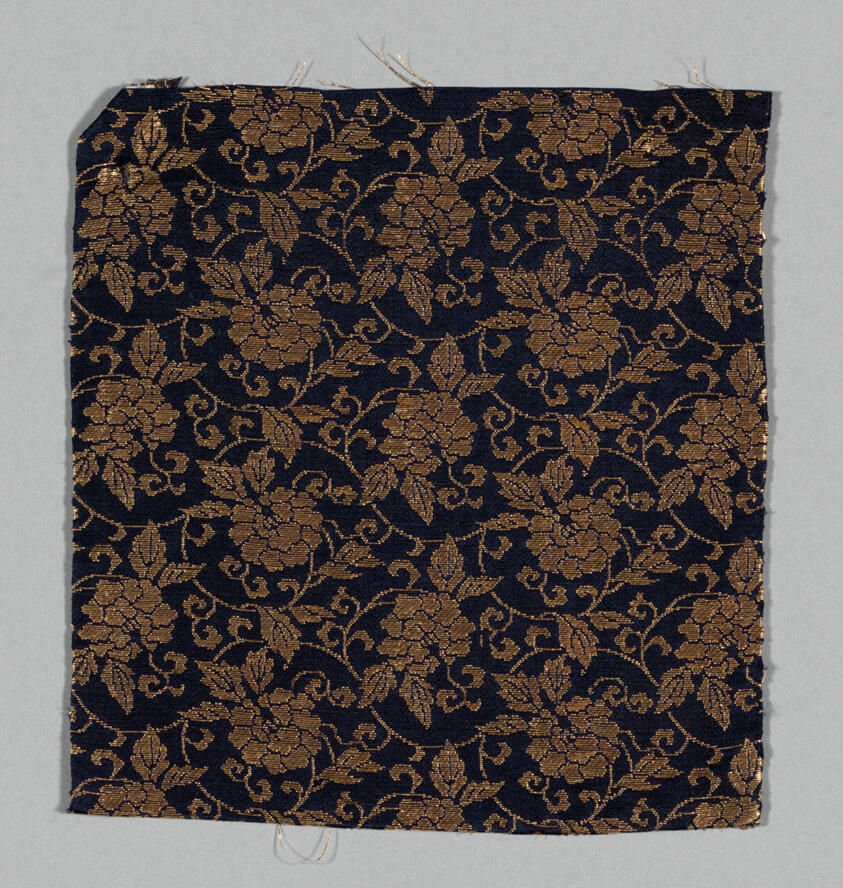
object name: Textile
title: Fragment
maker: Japan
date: late Edo period (1789–1868), 1800/25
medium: Silk and gold-leaf-over-lacquered-paper, twill weave with supplementary patterning wefts bound by secondary binding warps in twill interlacings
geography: Japan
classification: textile; weaving